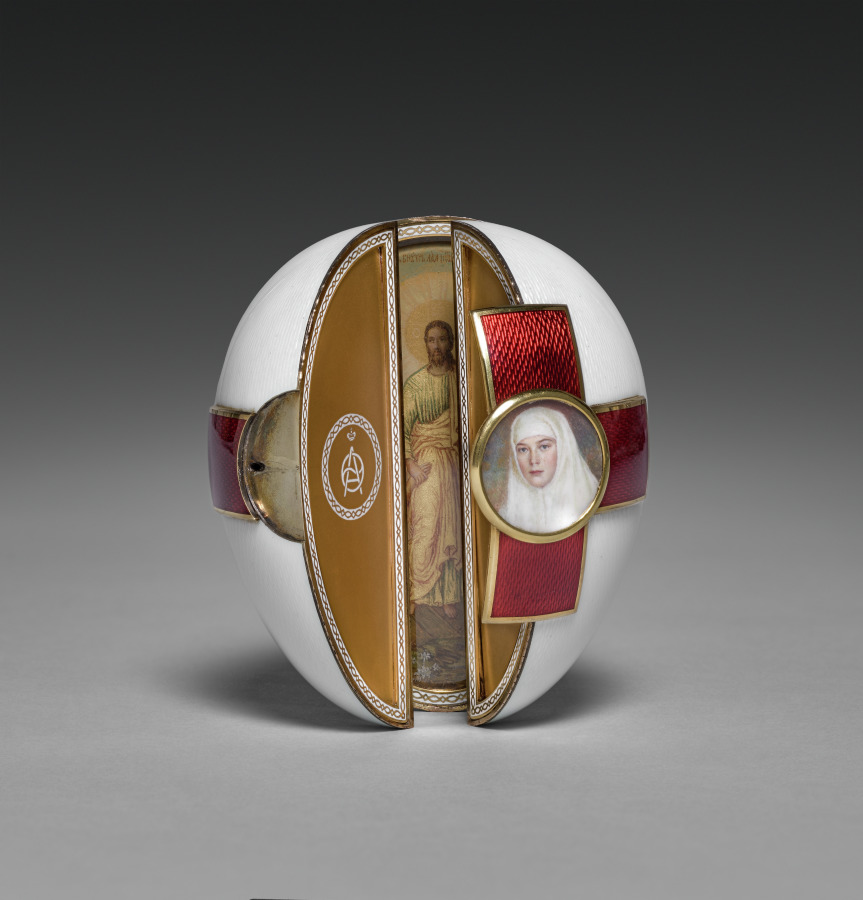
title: Imperial Red Cross Easter Egg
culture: Russia, St. Petersburg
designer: Peter Carl Fabergé (Russian, 1846–1920)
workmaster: Henrik Wigström (Russian, 1862–1923)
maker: House of Fabergé (Russian, 1842–1918)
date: 1915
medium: gold, silver gilt, enamel, glass, ivory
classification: Miscellaneous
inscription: inscribed on interior of egg: symbols for Alpha and Omega and imperial crown for Alexandra Feodorovna; 1915; inscriptions in Cyrillic, Old Church Slavonic, and Roman letters which identify Sts. Olga and Tatiana and presumably describe the central scene of the triptych.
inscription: Inscribed on silk velvet and satin lined case: double-headed eagle, Fabergé, Petersburg, Moscow, London (all in Cyrillic on lining of case); 17.559, abbreviation for "Red Cross" (in Cyrillic in red ink on outside of case).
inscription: Hallmarks: 72, Kokoshnik, lower case alpha in script [assay mark of St. Petersburg, 1908-26]; H.W. [initials of workmaster Henrik Wigström]; Fabergé (in Cyrillic).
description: The House of Fabergé made two imperial Easter eggs in 1915 that honored the contributions of Tsarina Alexandra and her two eldest daughters, Olga and Tatiana, to the war effort as Red Cross Sisters of Mercy. Compared to other Fabergé eggs elaborately ornamented with jewels, the eggs reflected the mood of austerity in Russia during World War I. This version becomes an icon when opened, revealing miniatures of the patron saints of the tsarina’s daughters. After the Russian Revolution, this relic of the Tsarist past was sold by the Soviet government to raise needed cash for the treasury.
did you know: This egg was confiscated by the Bolsheviks during the Russian Revolution and sold by the government of Josef Stalin in the 1930s to raise money for the Soviet treasury.